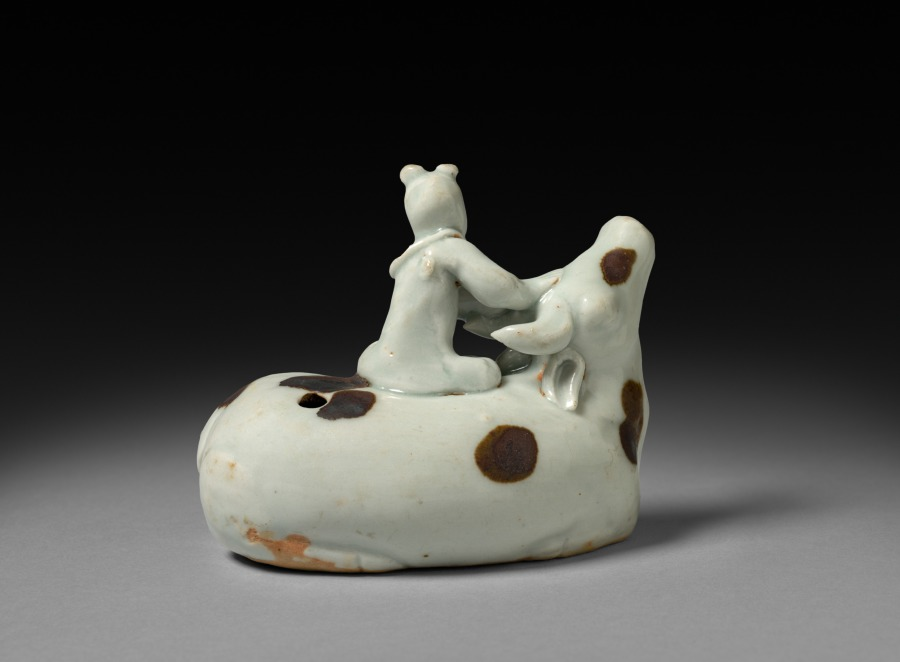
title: Buffalo with Rider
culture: China, Jiangxi Province, Jingdezhen kilns, Yuan dynasty (1271–1368)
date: early 1300s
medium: glazed porcelain with iron spots, qingbai ("blue-white") ware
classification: Ceramic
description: Boys tending buffalos were associated with a carefree life in the countryside free from the duties of officialdom. Water droppers contained water that was used to dissolve ink sticks into liquid ink for brush painting and writing.